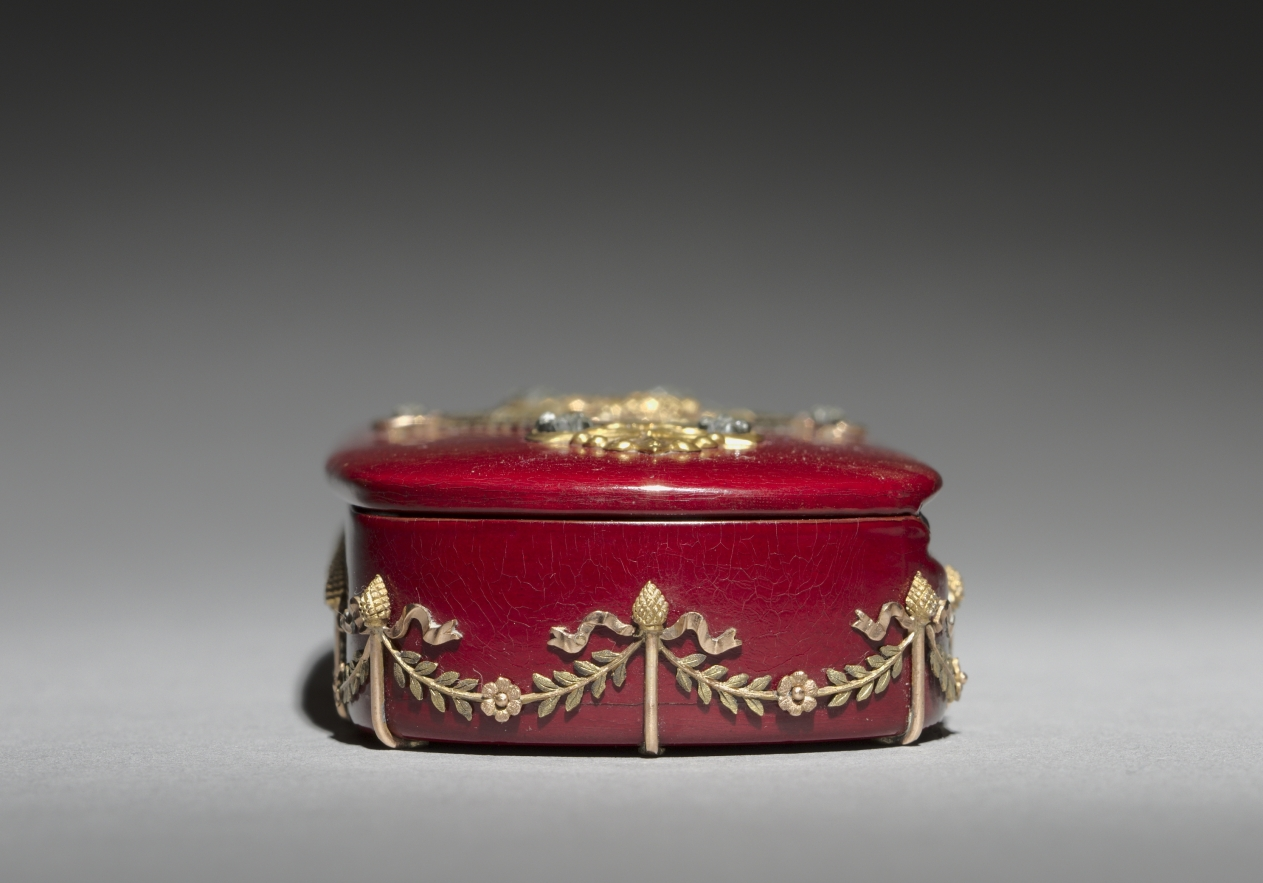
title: Lacquer Box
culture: Russia, St. Petersburg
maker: House of Fabergé (Russian, 1842–1918)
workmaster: Factory N. Lukutin (Russian)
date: c. 1890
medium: lacquer, papier-mâché, gold, diamonds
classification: Miscellaneous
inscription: inscribed (inside cover): Factory N. Lukutine (in Cyrillic script in gold); three double-headed eagles in gold.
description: This lacquer box was created by the Lukutin Factory, which was well known for creating boxes such as this one after Piotr Lukutin took charge of production and expanded the factory to include tea caddies and various desk accessories. This particular box from the Lukutin workshop is remarkable in its detailed gold patterns and diamond inlays that create an intentional contrast with the deep red surface.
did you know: Piotr Lukutin’s workshop employed over 50 skilled painters as well as acted as a school for training apprentices.